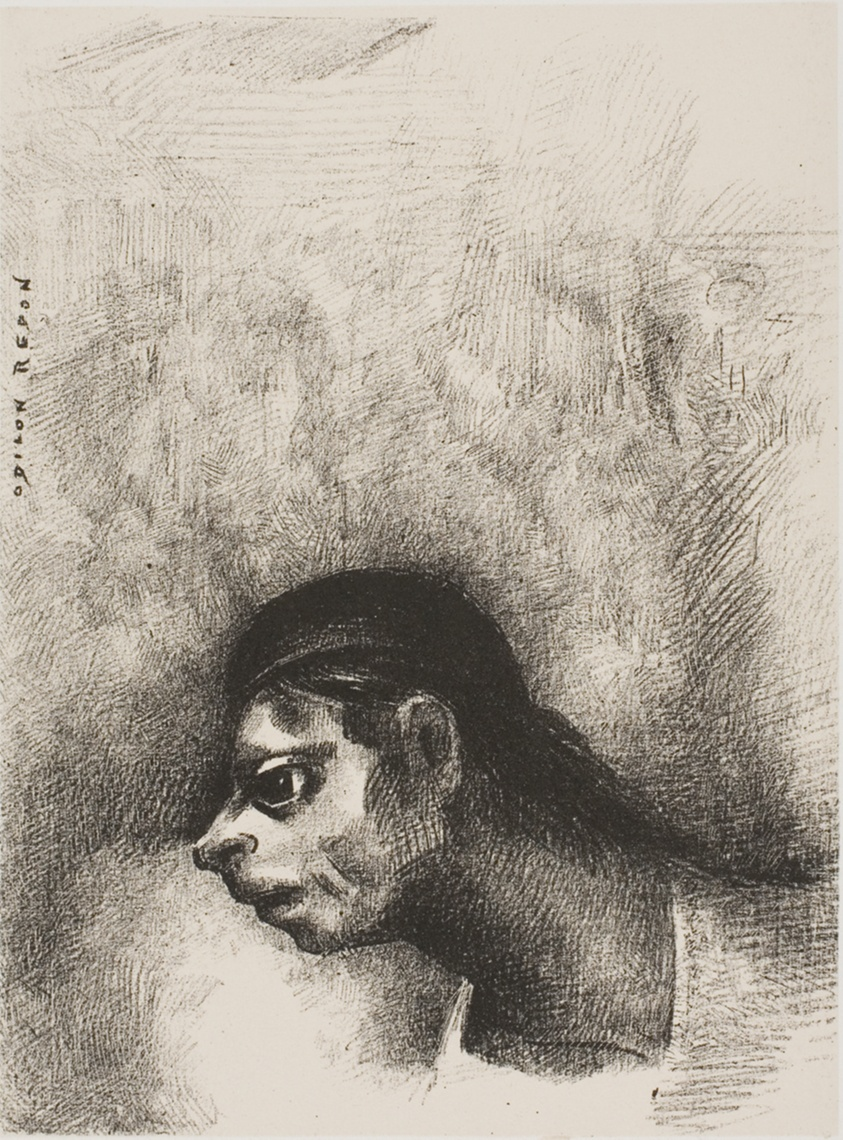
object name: Print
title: Through the Crack in the Wall, a Death's Head Was Projected, from The Juror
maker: Odilon Redon (French, 1840-1916)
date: 1887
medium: Lithograph in black on ivory China paper collé, laid down on white wove paper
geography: France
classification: lithograph; print; prints and drawing; paper